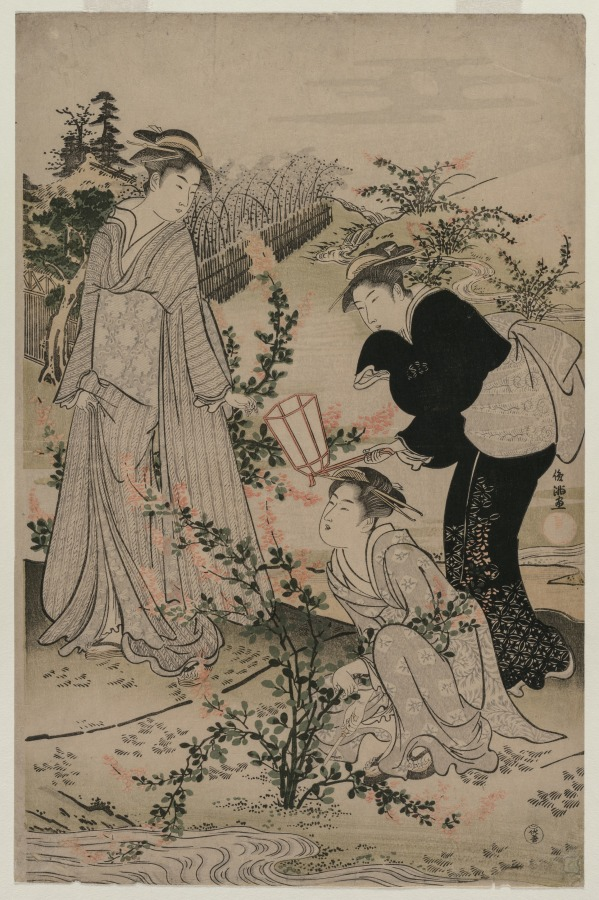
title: Women Cutting Branches of Bush Clover; The Noji Tama River in Omi Province, from an untitled series of the Six Tama Rivers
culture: Japan, Edo period (1615–1868)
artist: Kubo Shunman (Japanese, 1757–1820)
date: late 1780s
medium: color woodblock print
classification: Print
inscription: Signature: Shumman ga Artist Seal: Shumman Publisher: Fushimiya Zenroku (Fushizen)